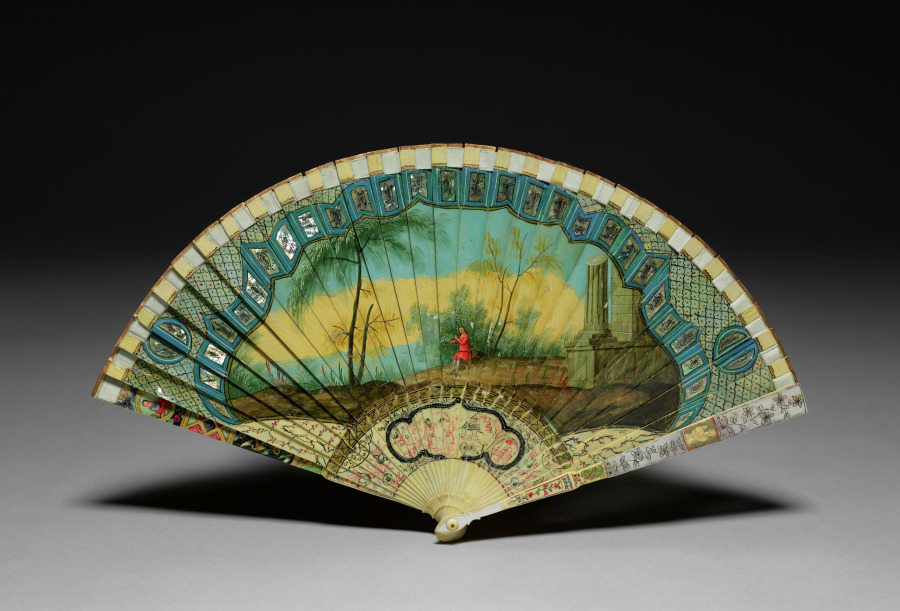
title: Fan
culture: France(?)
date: 1800s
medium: bone, mother-of-pearl, ivory washer, silk ribbon, oil paint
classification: Miscellaneous